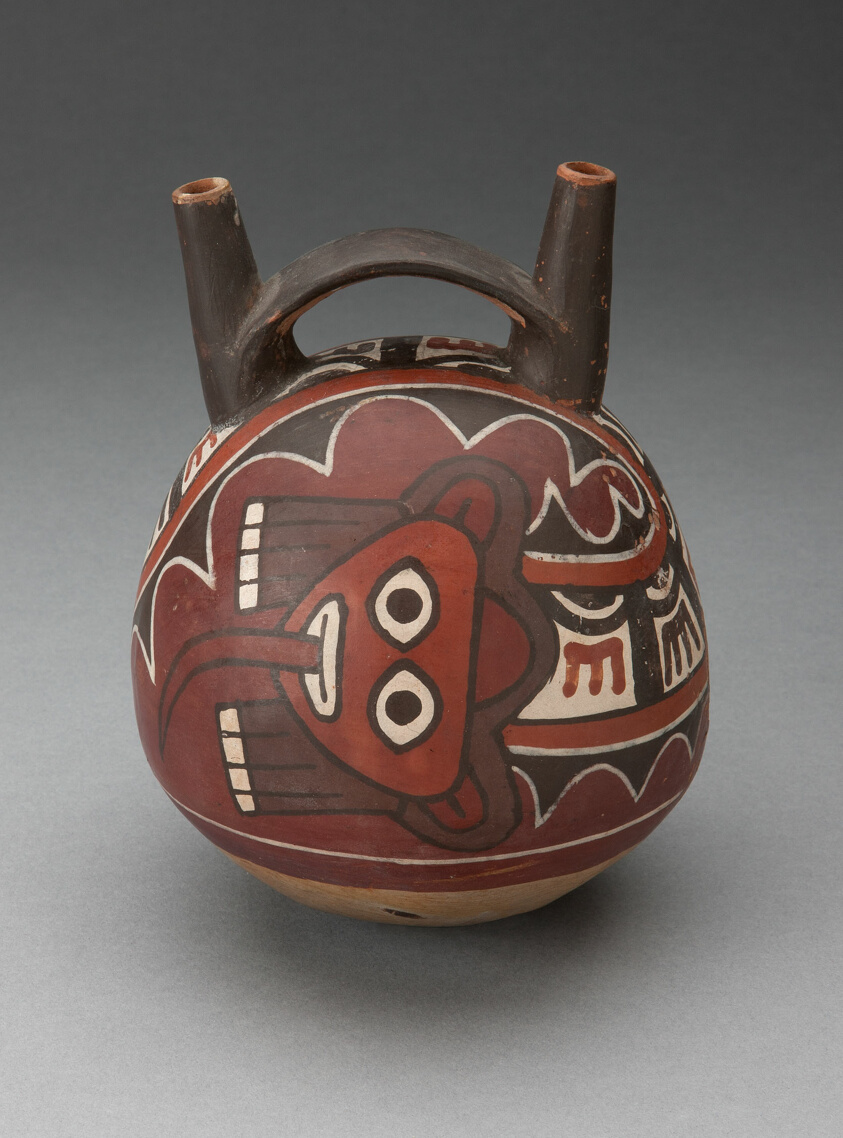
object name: Vessel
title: Double Spout Vessel Depicting Masked Figure with Serpent Attributes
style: nazca, early intermediate period, Pre-Columbian, americas, Arts of the Americas, andean, andes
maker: Nazca; South coast, Peru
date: 180 BCE–500 CE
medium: Ceramic and pigment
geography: Nazca Valley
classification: earthenware; art of the americas; ceramics; vessel